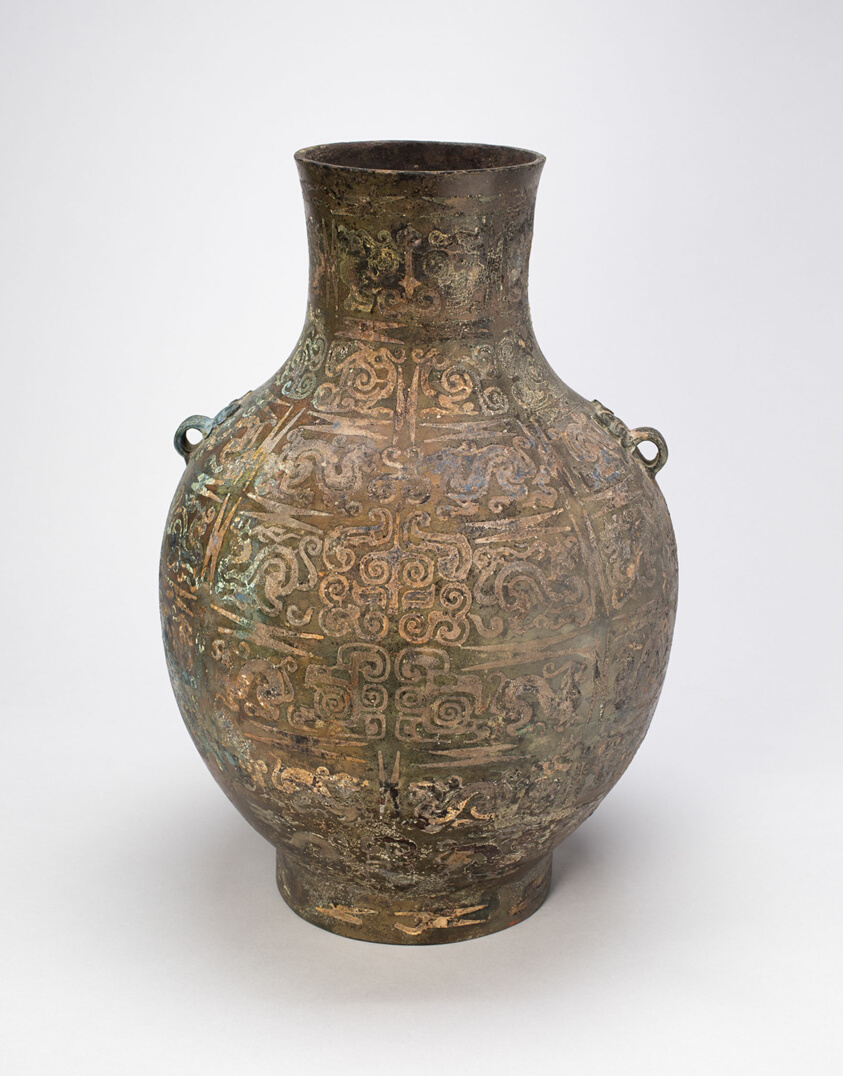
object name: Vessel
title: Wine Jar (Hu)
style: Chinese (culture or style)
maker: China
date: Eastern Zhou dynasty, Warring States period (480–221 B.C.), c. 3rd century B.C.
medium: Bronze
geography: China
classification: bronze; metal; vessel; asian art